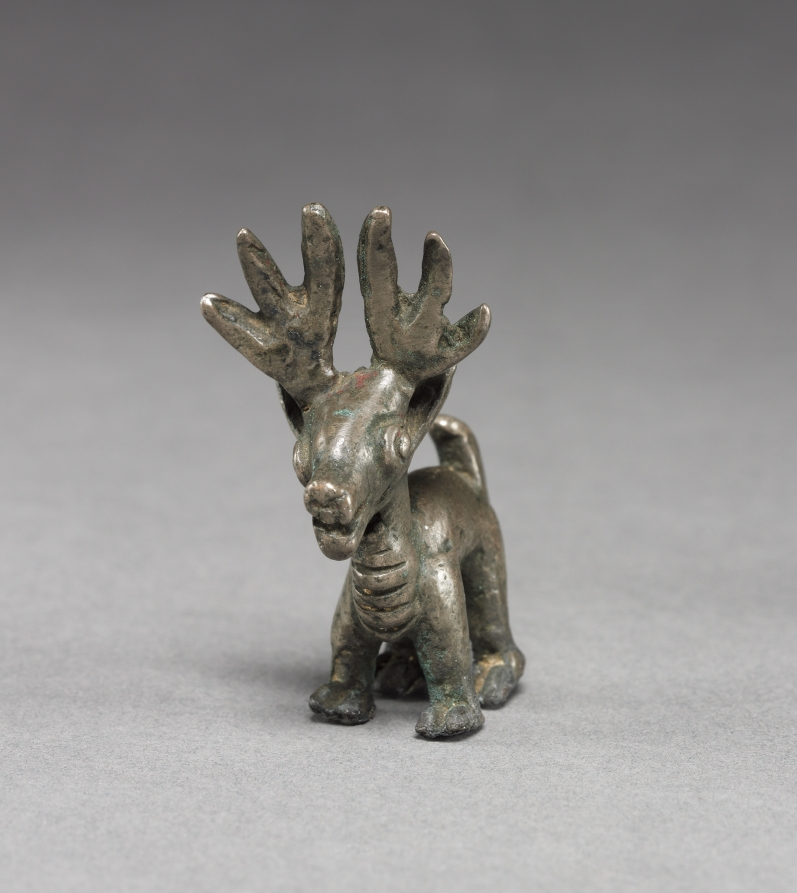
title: Deer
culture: Peru, Ica Valley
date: 1000–1532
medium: silver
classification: Metalwork